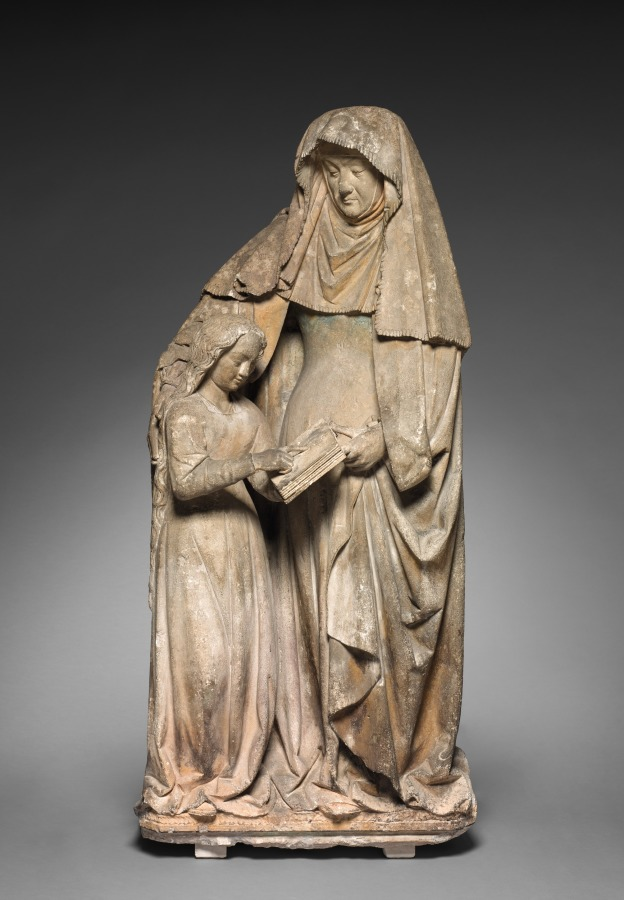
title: Education of the Virgin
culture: France, Bourbonnais, 16th century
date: c. 1500–1510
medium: limestone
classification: Sculpture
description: This relief depicts the young Virgin Mary learning to read at the knee of her mother Anne.